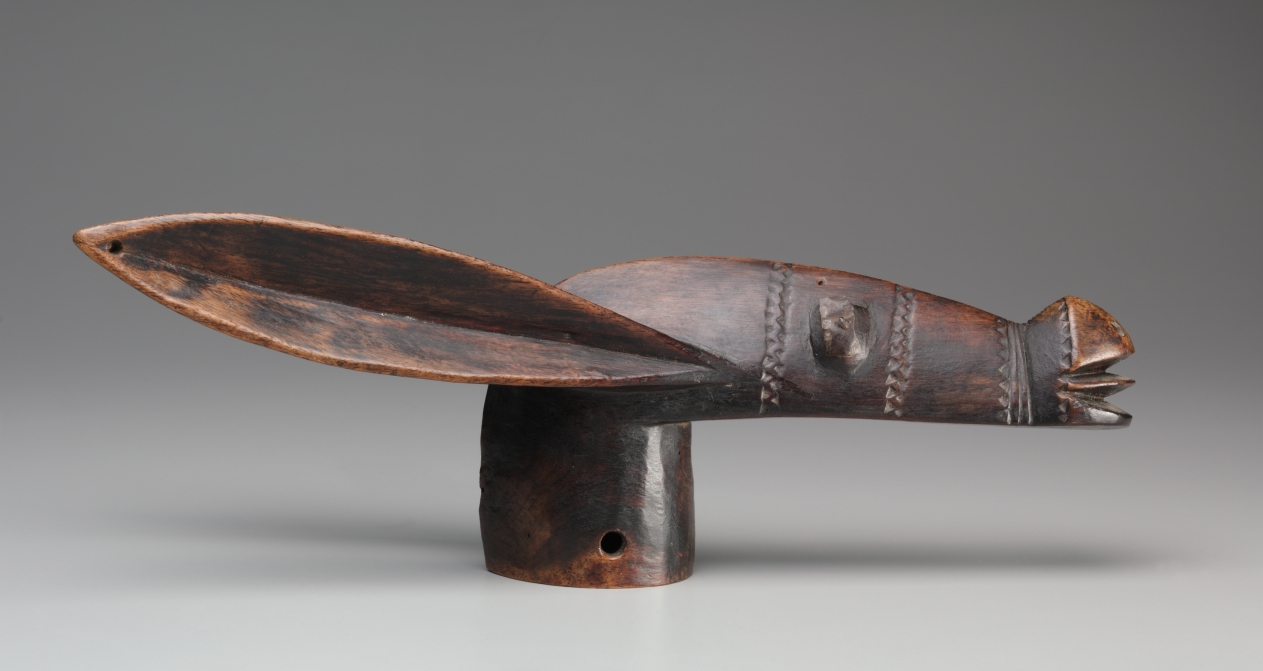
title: Head of a Hobbyhorse (korèdugaso)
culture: Africa, West Africa, Mali, Bamana blacksmith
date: late 1800s–early 1900s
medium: Wood and iron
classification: Sculpture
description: Pertaining to the male initiation society called Korè, this sculpture from the Koulikoro region represents the head of an aardvark and is part of a wooden hobbyhorse that is mounted by a ritual buffoon. The Korè initiates are divided into different classes, each having a designated mask. The ritual buffoons appear in pantomimes on different public occasions and poke fun at village authorities and other high-ranking individuals.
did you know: This is one of the best-known examples of a korèdugaso. It was featured on the catalogue cover for a 1935 exhibition at the Museum of Modern Art, one of the first on African arts in the US. It traveled to the CMA that same year.